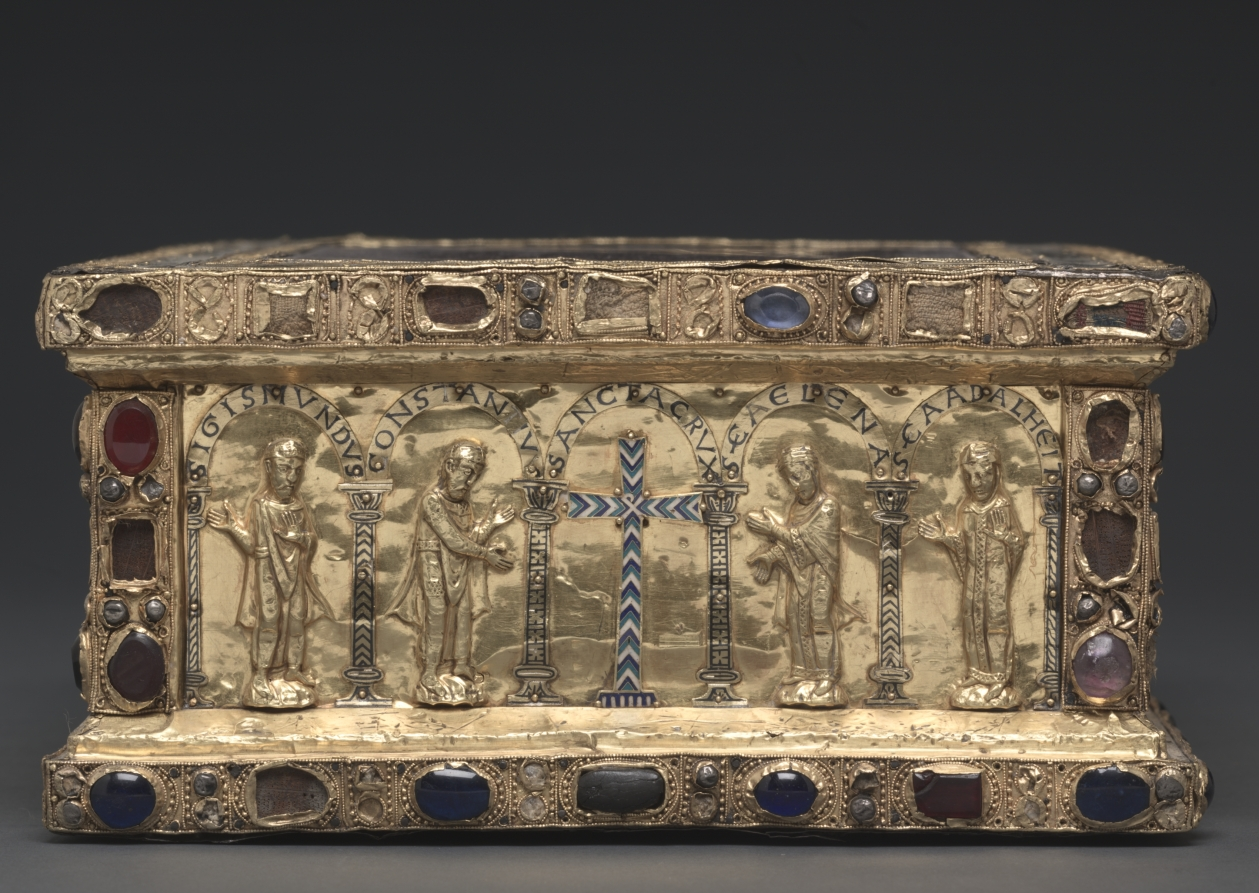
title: Portable Altar of Countess Gertrude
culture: Germany, Lower Saxony?, Romanesque period, 11th century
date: c. 1045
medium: gold, cloisonné enamel, porphyry, gems, pearls, niello, wood core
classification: Metalwork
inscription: GERDRVDIS XPO FELIX VT | VIVAT IN IPSO OBTVLIT HVNC LAPIDEM GEMMIS | AVROQ NITENTEM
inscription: SIGISMVNDVS, CONSTANTIVS, SANCTA CRVX, SCA ELENA, SCA ADALHEIT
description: Commissioned by Countess Gertrude of Brunswick, this portable altar is one of the Guelph Treasure’s earliest and most sumptuous objects. The choice of white-speckled porphyry as the altar stone signals Gertrude’s worldly aspirations; an imperial color since classical antiquity, porphyry was only used by the imperial family. Historical figures of royal and imperial rank are depicted with Christ, the Virgin, apostles, and archangels along the altar’s sides, stressing the countess’s political ambitions and claim of imperial lineage for her own dynasty. The Latin inscription surrounding the altar stone reads, "Gertrude offers to Christ, to live joyfully in him, this stone that glistens with gems and gold."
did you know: On the bottom of this altar is a trap door that opened to reveal small relics of saints wrapped in silk.